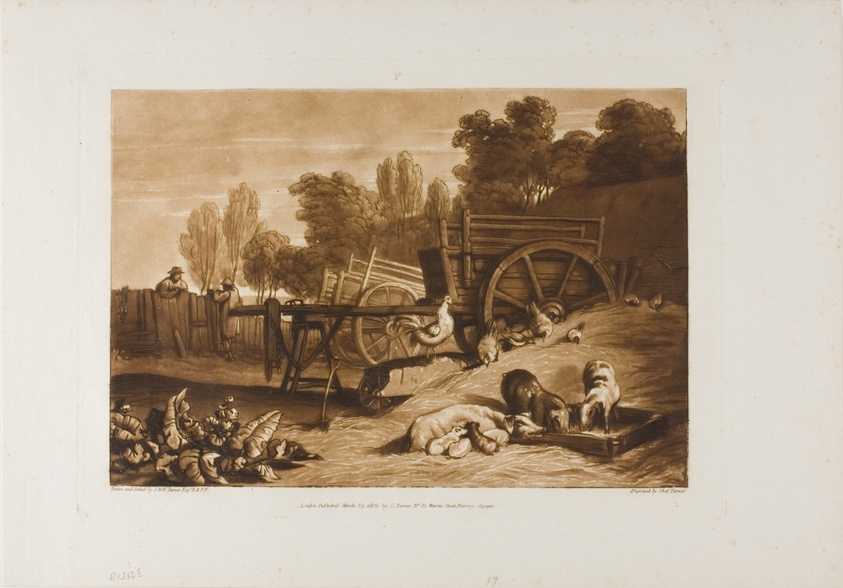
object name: Print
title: The Farm Yard with the Cock, plate 17 from Liber Studiorum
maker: Joseph Mallord William Turner (English, 1775-1851); Engraved by Charles Turner (English, 1773-1847)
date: published March 29, 1809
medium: Etching and engraving in brown on iovry laid paper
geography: England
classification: etching; print; prints and drawing